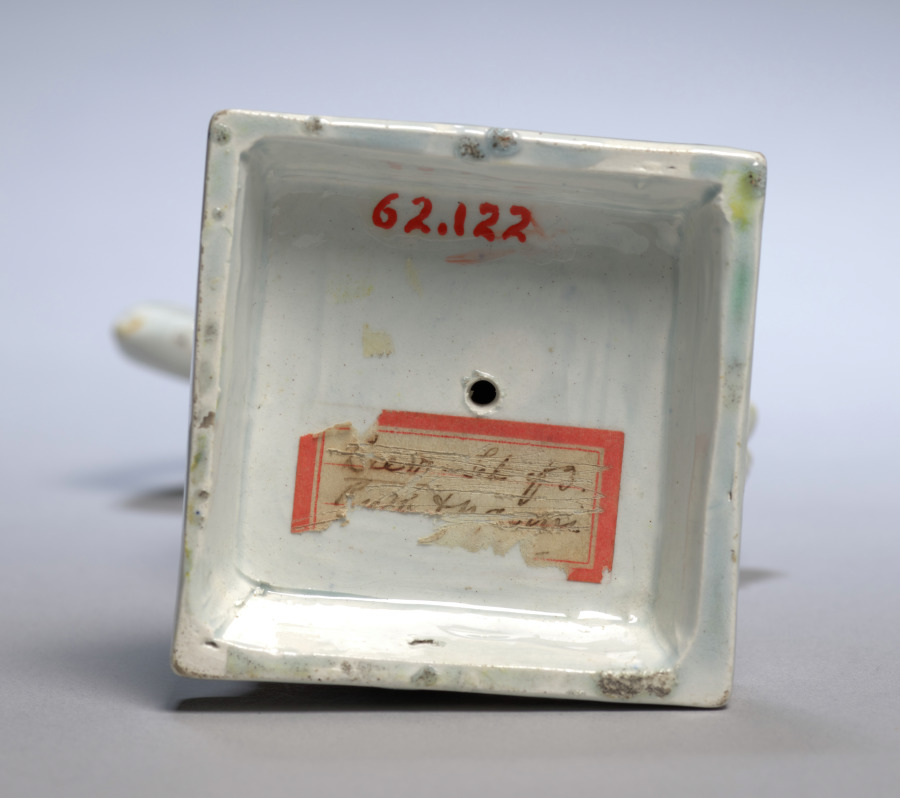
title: Bacchus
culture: England, Staffordshire, Pratt ware, late 18th-early 19th Century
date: c. 1800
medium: earthenware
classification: Ceramic